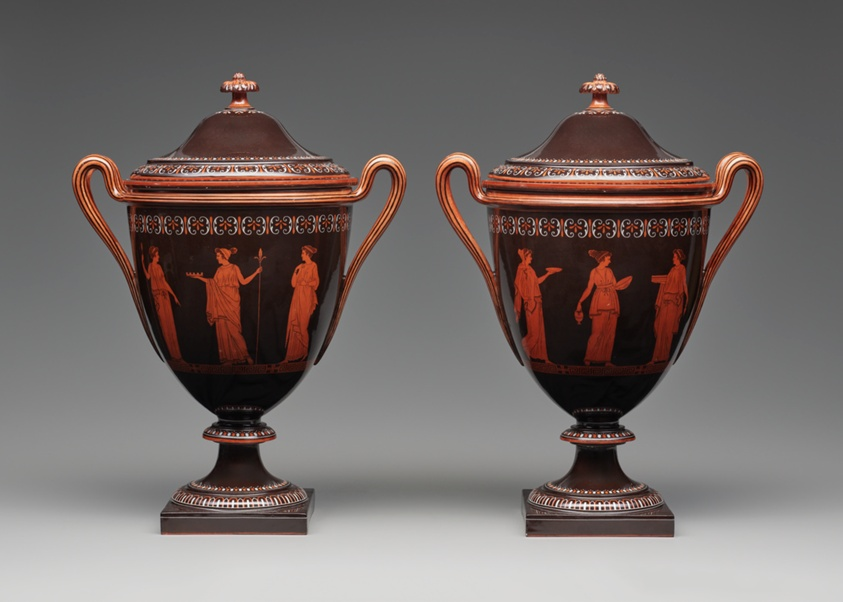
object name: Ceramics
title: Ice Cream Cooler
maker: Vienna State Porcelain Manufactory (Austrian, 1744-1864)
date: 1804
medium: Hard-paste porcelain and enamel decoration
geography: Vienna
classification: tableware; ceramics; porcelain; european decorative arts